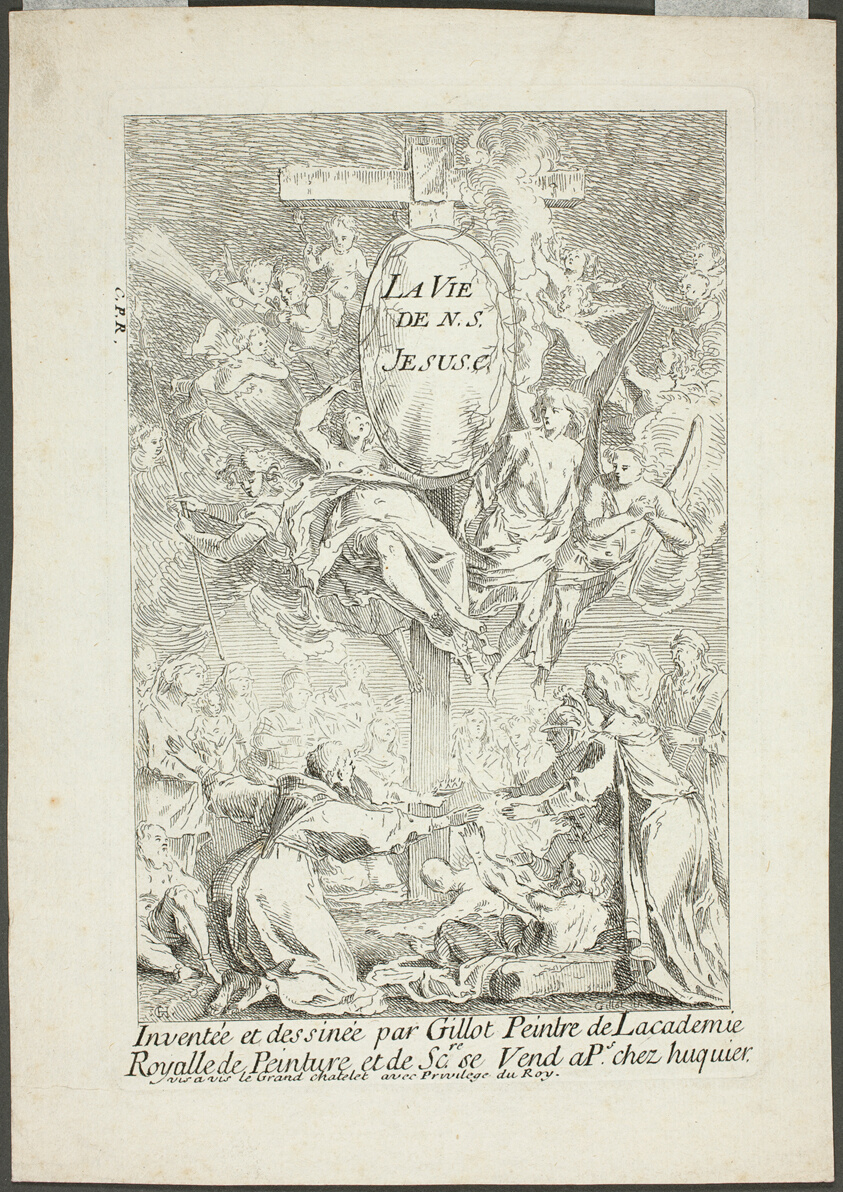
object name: Print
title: The Life of our Lord Jesus Christ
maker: Gabriel Huquier (French, 1695-1772); after Claude Gillot (French, 1673-1722)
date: 1720/32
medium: Etching on cream laid paper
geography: France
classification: etching; print; prints and drawing